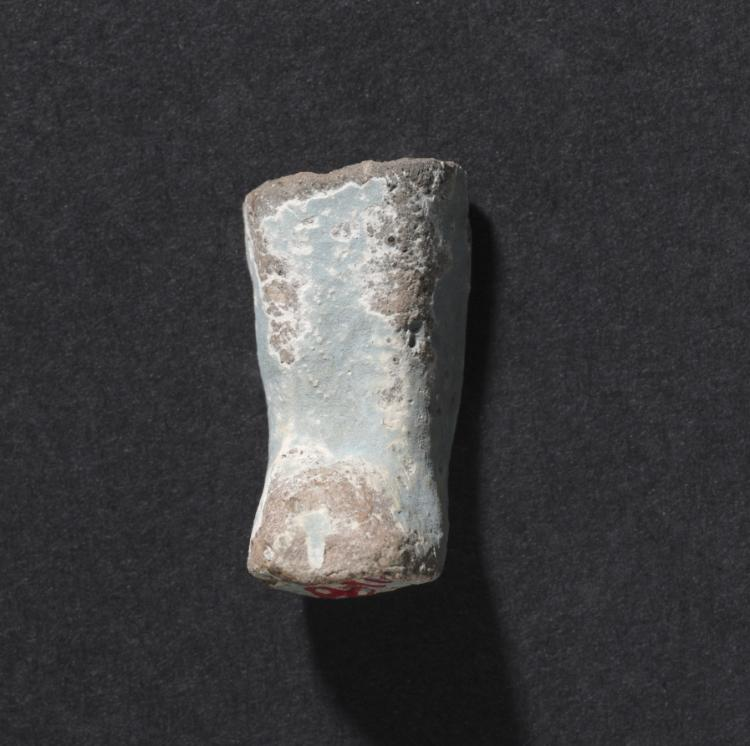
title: Shawabty of Ditamenpaankh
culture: Egypt, Late period (715–332 BCE), Dynasty 25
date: 715–656 BCE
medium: terracotta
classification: Funerary Equipment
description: High demand for shawabtys in the Late Period, a time when as many as 400 or more shawabtys were placed in the tomb with the deceased, gave rise to a specialized container for storing them: the shawabty box. This example is inscribed for the lady of the house, Ditamenpaankh, and was probably one of a pair originally made for her. The single-masted boat on the box's lid is perhaps an allusion to the pilgrimage of the deceased to the holy city of Abydos, the cult city of Osiris, king of the dead. The shawabtys inside are crude, mass-produced examples cast in an open mold. Made of terracotta, their blue paint imitates more costly shawabtys made of faience. As for the shawabty spell, it has been removed from its traditional location on the shawabty's front and relocated onto the sides of box, where it needed only to be written once, thus expediting production.